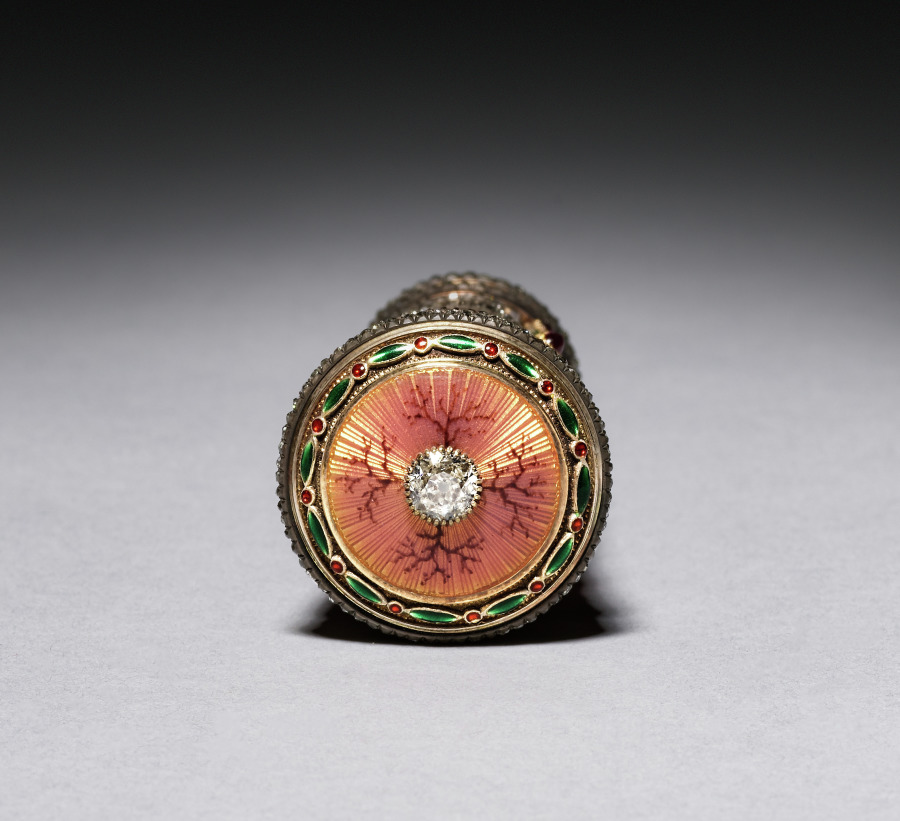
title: Parasol Handle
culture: Russia, St. Petersburg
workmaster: Michael Evlampievich Perchin (Russian, 1860–1903)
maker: House of Fabergé (Russian, 1842–1918)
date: c. 1886–1903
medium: Gold, enamel, diamonds, and platinum filigree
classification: Metalwork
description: Women devised many methods to protect themselves from the sun when strolling outside at the end of the nineteenth century. One constant barrier from the harsh rays was the daytime parasol which looked like an umbrella but was used strictly for shade. The House of Fabergé specialized in providing fashionable wealthy ladies with bejeweled handles such as this example, which could be screwed directly into the end of the parasol shaft when a more formal look was desired.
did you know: A wealthy lady around 1900 could unscrew her jeweled parasol handle and take it with her for safekeeping or swap it for another color.